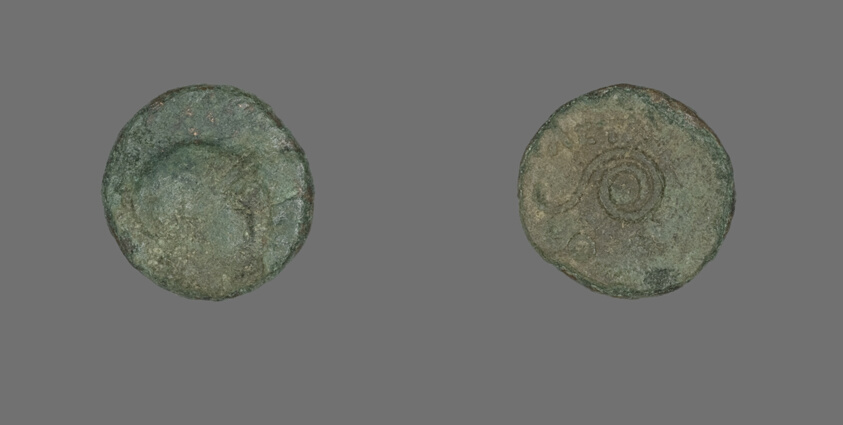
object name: Coin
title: Coin Depicting the Goddess Athena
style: greek, ancient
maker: Greek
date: 159-138 BCE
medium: Bronze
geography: Ancient Greece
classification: coin; ancient art